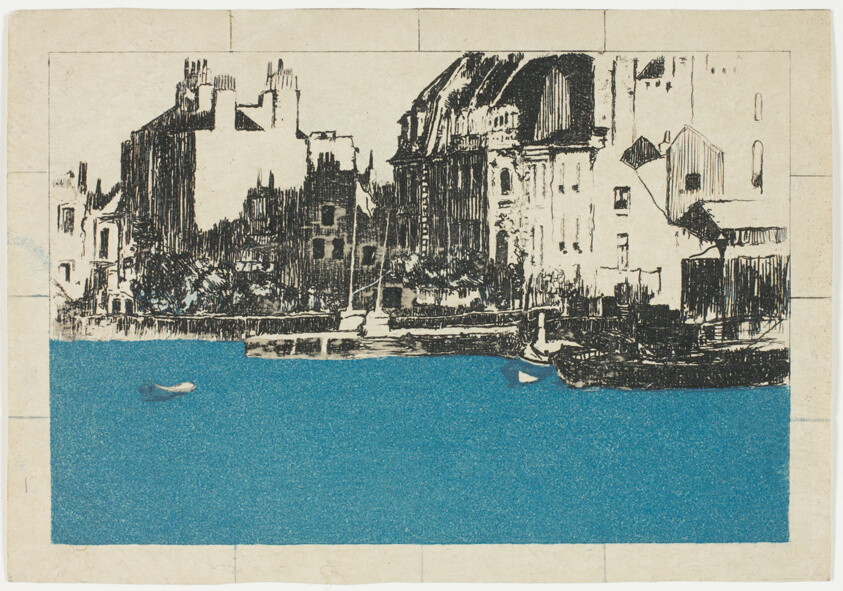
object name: Print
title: Chelsea Palaces (Color Version)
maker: Theodore Roussel (French, worked in England, 1847-1926)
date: 1890–97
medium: Etching and aquatint in black and blue on cream wove paper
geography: England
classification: etching; paper; print; prints and drawing